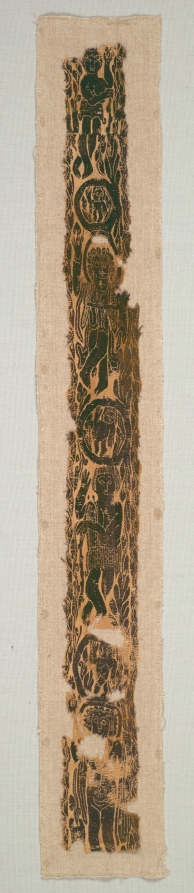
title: Ornamental Shoulder Band from a Tunic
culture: Egypt, Byzantine period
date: 600–650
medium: tapestry weave with supplementary weft wrapping; undyed linen and dyed wool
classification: Textile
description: On this tunic decoration, human figures appear to dance amid leafy plants. The first and third figures are shepherds, each wearing spotted animal–skin garments and holding wooden staffs. The second and fourth figures are dancers; the upper one wears a short draped garment (peplos), and the lower one appears nude except for a scarf draped over her shoulders. The brown-purple wool was dyed with kermes, a bluish-red dye from dried insects, and indigo in an unsuccessful attempt to imitate purple.